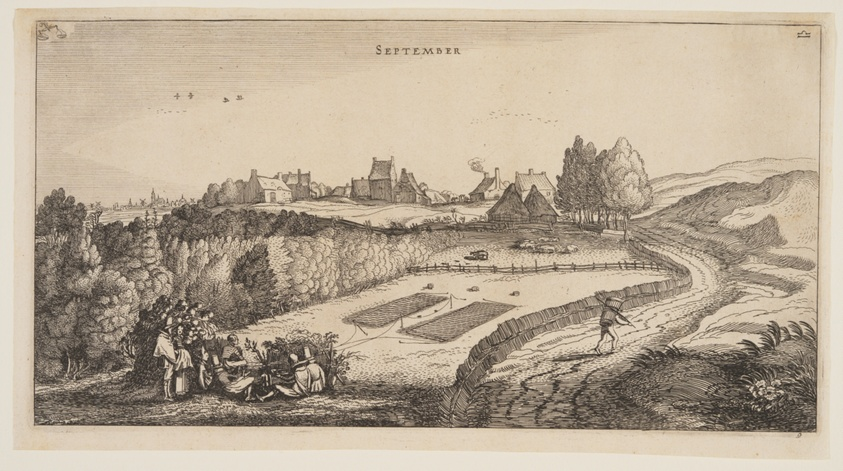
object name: Print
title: September, from The Twelve Months of the Year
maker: Jan van de Velde II (Dutch, c. 1593–1641); after Willem Buytewech (Dutch, c. 1591–1624)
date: 1616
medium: Etching on ivory laid paper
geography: Netherlands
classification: etching; paper; print; prints and drawing